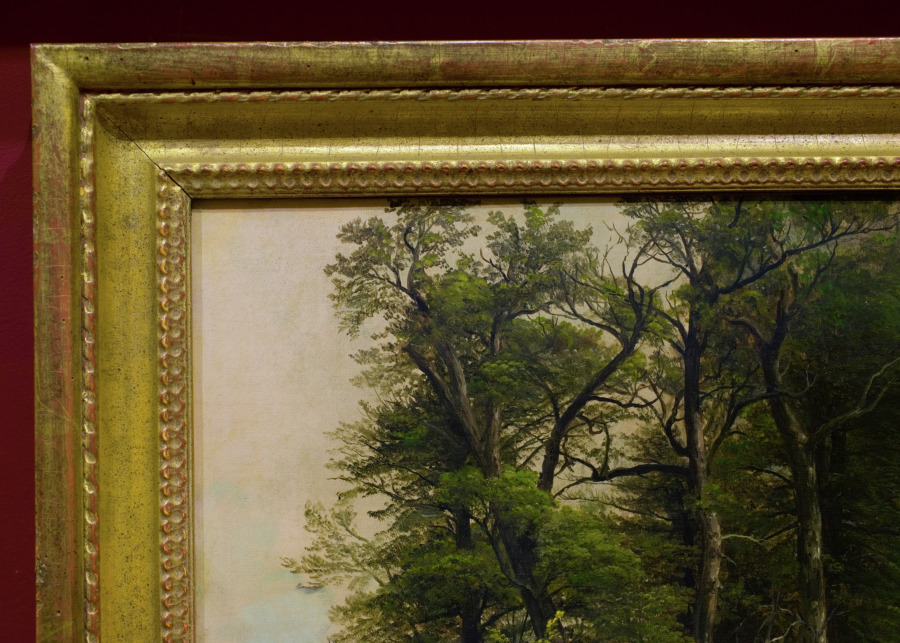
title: Trees on a Rocky Hillside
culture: America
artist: Asher B. Durand (American, 1796–1886)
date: c. 1849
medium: oil on canvas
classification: Painting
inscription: Signed lower left: "ABD"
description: Durand was one of the first American artists to paint outdoors, rather than in the confines of a studio, which was the longstanding tradition. This outdoor oil sketch of a seemingly random corner of the woods offers an intimate view of a rock outcropping amid lush vegetation. Its small-scale, unusually cropped composition contrasts with the sweeping vistas in many other landscapes of the era.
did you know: Before becoming a painter, Durand designed paper currency for the federal government.